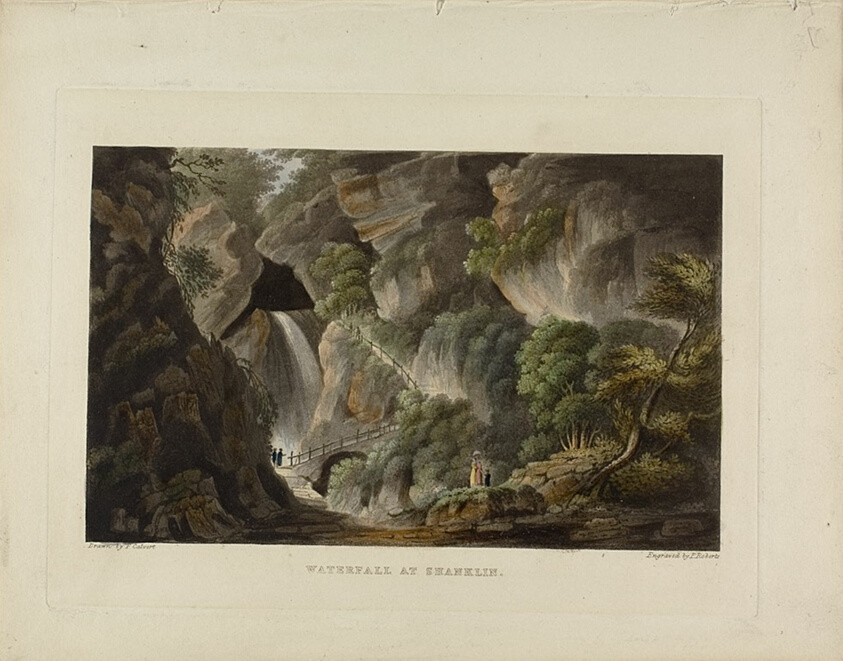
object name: Print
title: Waterfall at Shanklin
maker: P. Roberts (English, 19th century); after Raisey Calvert (English, died 1794)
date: c. 1794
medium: Color aquatint on paper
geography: England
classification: aquatint; print; prints and drawing